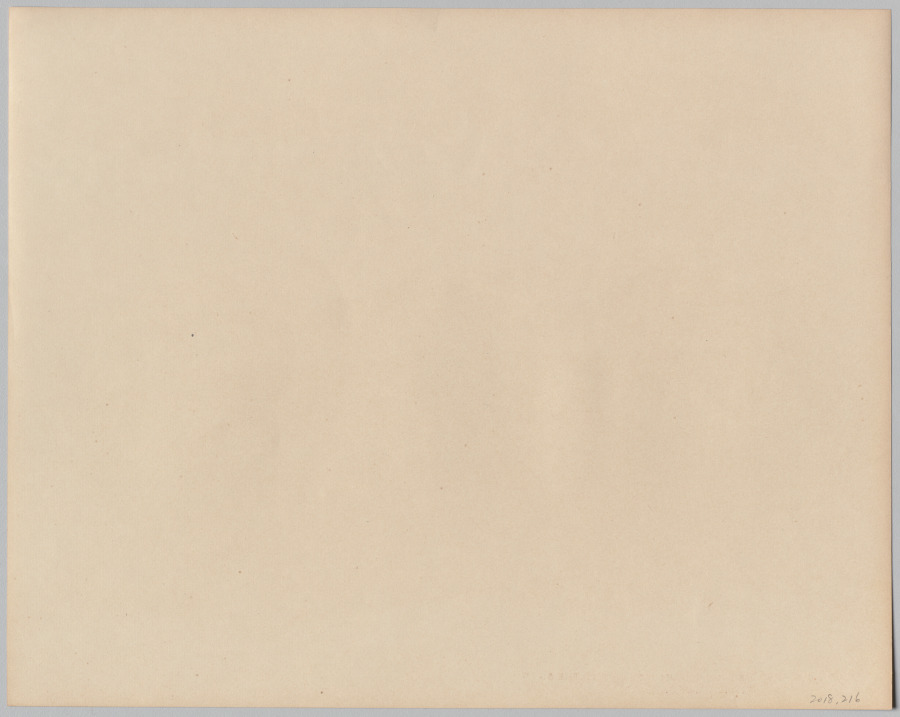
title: Darjeeling. Kinchinjunga and the Snows from Kutcherry Hill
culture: India, 19th century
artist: Photoglob Co. (Zurich, active c. 1890–1910)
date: 1890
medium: Photochrom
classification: Photograph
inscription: Imprinted in gold on recto in lower left corner: “20060. P.Z.-DARJEELING. KINCHINJUNGA AND THE SNOWS/FROM KUTCHERRY HILL”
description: The photographer chose a very high horizon line in order to emphasize the grandeur and scale of the mountains and foothills of the Lesser Himalayas. In the foreground, the human settlements are dwarfed by nature’s creation, but the greenery they offer is refreshing and hospitable in contrast to the severity of the rock and cragged, snow-covered peaks.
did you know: The largest peak in the background is Kinchinjunga, the third highest mountain in the world and the tallest in India.